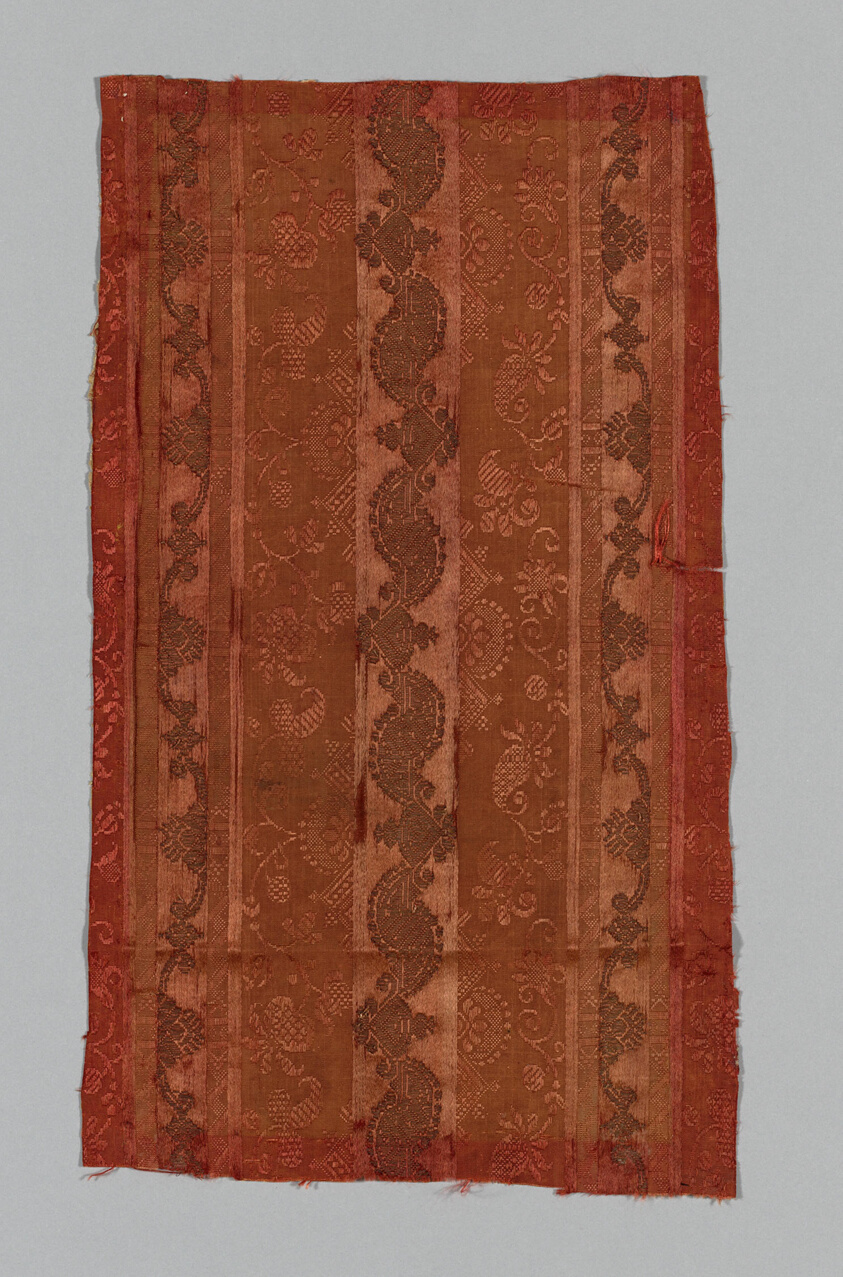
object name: Textile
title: Fragment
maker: Italy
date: 1675/1700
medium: Silk and gilt-metal-strip-wrapped silk, satin weave and plain weave with supplementary brocading wefts and supplementary self-patterning warps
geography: Italy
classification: textile; weaving